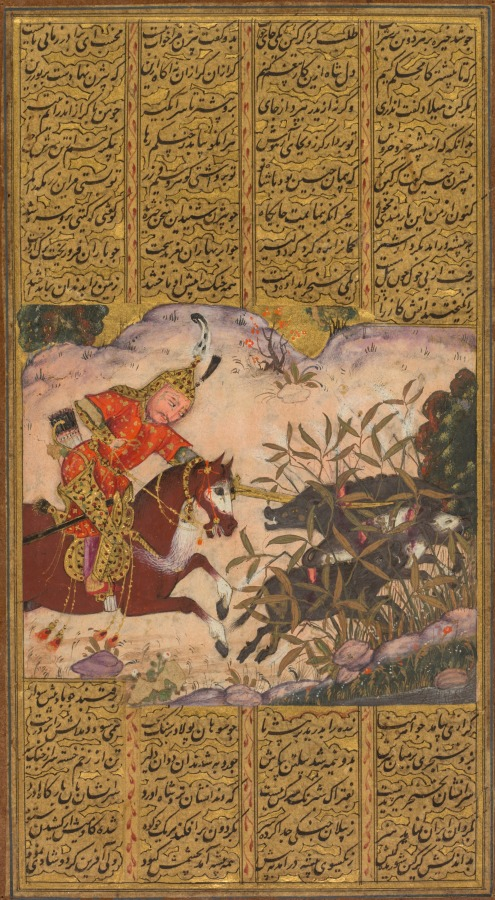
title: Bijan killing the wild boars of Irman, from a Shah-nama (Book of Kings) of Firdausi (Persian, about 934–1020) (verso)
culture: India, Bijapur, Deccan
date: c. 1610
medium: Gum tempera, ink, and gold on paper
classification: Painting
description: This illustrated page from a Shah-nama depicts the first adventure of the hero Bijan, son of an Iranian knight. When reports arrived at the king’s court of wild boars ravaging the borderlands between the enemy realms of Iran and Turan, Bijan volunteered to hunt and kill the beasts, much to the chagrin of his father, who doubted his young son’s ability to navigate the politically volatile situation. The fearless Bijan is shown on horseback as he singlehandedly strikes the bodies of the boars in the brush. After overzealously celebrating his success, Bijan must be rescued from a pit by Rustam. This early manuscript from the Deccan made for the sultan of Bijapur is characterized by glowing colors and lavish use of gold.